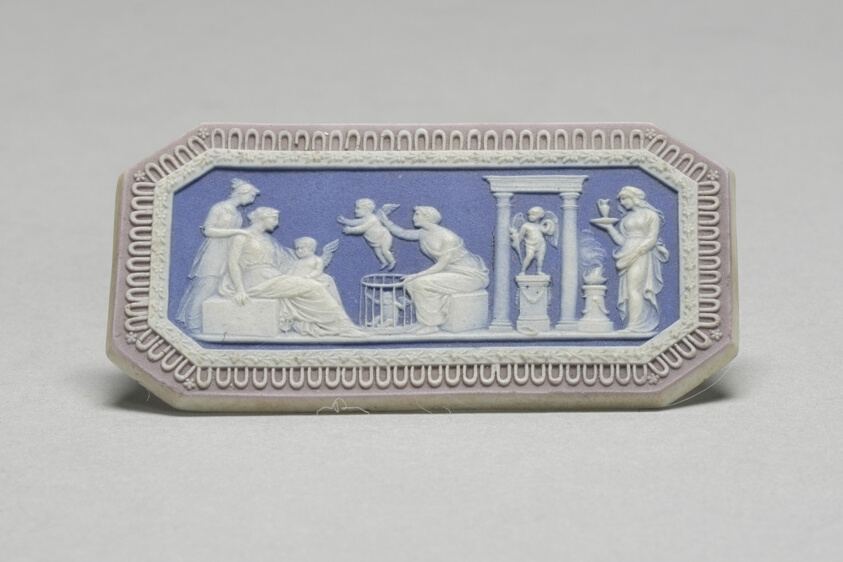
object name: Ceramics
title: The Cupid Seller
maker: Wedgwood Manufactory; England, founded 1759; Etruria, Staffordshire, England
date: c. 1783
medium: Stoneware (jasperware)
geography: Burslem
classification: cameo (sculpture); sculpture; stoneware; european decorative arts; ceramics